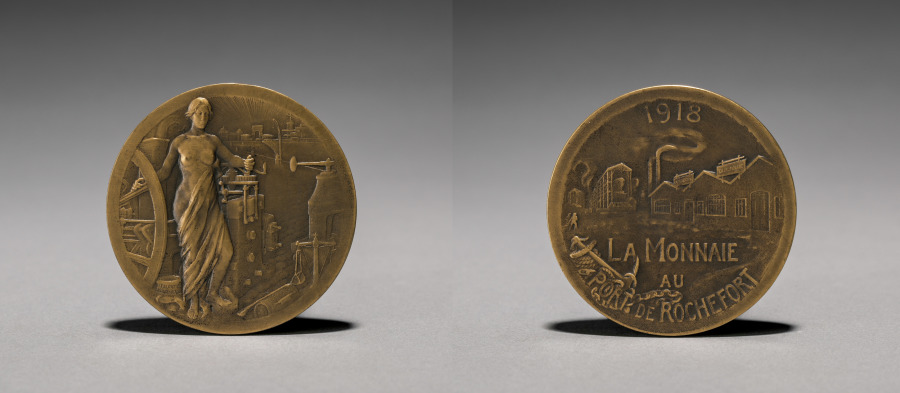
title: Medal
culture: France, 20th century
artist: Edmond-Eugene-Emile Lindauer (French, 1869–1942)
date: 1918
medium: bronze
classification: Metalwork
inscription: reverse - "La Monnaie au Port de Rochefort"